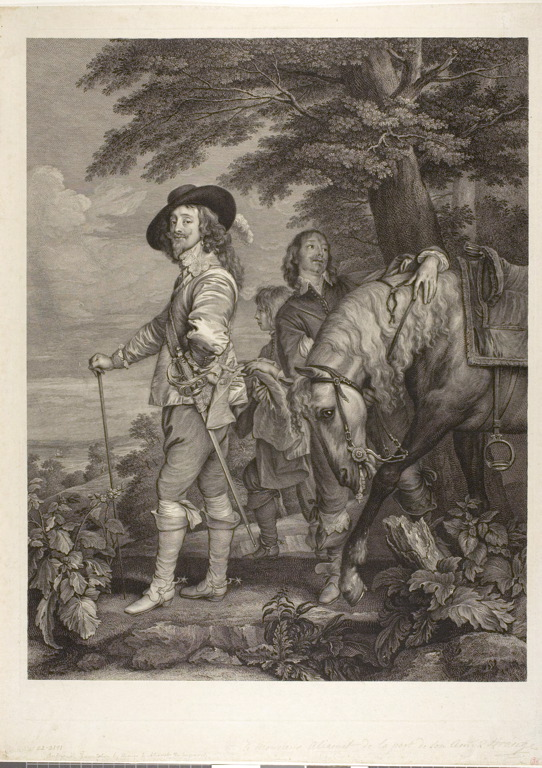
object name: Print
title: Charles I, King of England, with James, 1st Duke of Hamilton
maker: Sir Robert Strange (Scottish, 1721-1792); after Sir Anthony van Dyck (Flemish, 1599-1641); printed by Robbe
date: 1782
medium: Engraving with etching in black on ivory laid paper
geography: Scotland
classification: etching; print; prints and drawing